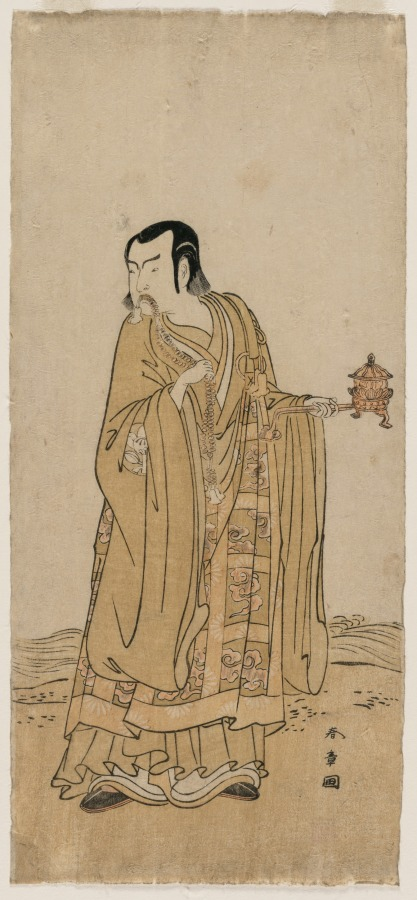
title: Ichimura Uzaemon IX as Shingen in “A String of Prayer Beads Shaken at a Ribbon of Waterfall”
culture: Japan, Edo period (1615–1868)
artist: Katsukawa Shunshō (Japanese, 1726–1792)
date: 1775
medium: color woodblock print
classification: Print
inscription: 春章画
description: Once the center print of a triptych (a composition of three prints), this design shows Ichimura Uzaemon IX playing Takeda Harunobu (1521–1573), a storied general who received the name Shingen upon taking Buddhist vows. In the story, Shingen attempts to cut off his enemy’s water supply, using a spell to imprison the dragon god who controlled it. However, a young woman named Sakura-hime gets him drunk. While he is indisposed, she and her lover release the dragon, whereupon it rains. Here, Shingen, in Buddhist robes, grips his string of prayer beads between his teeth.